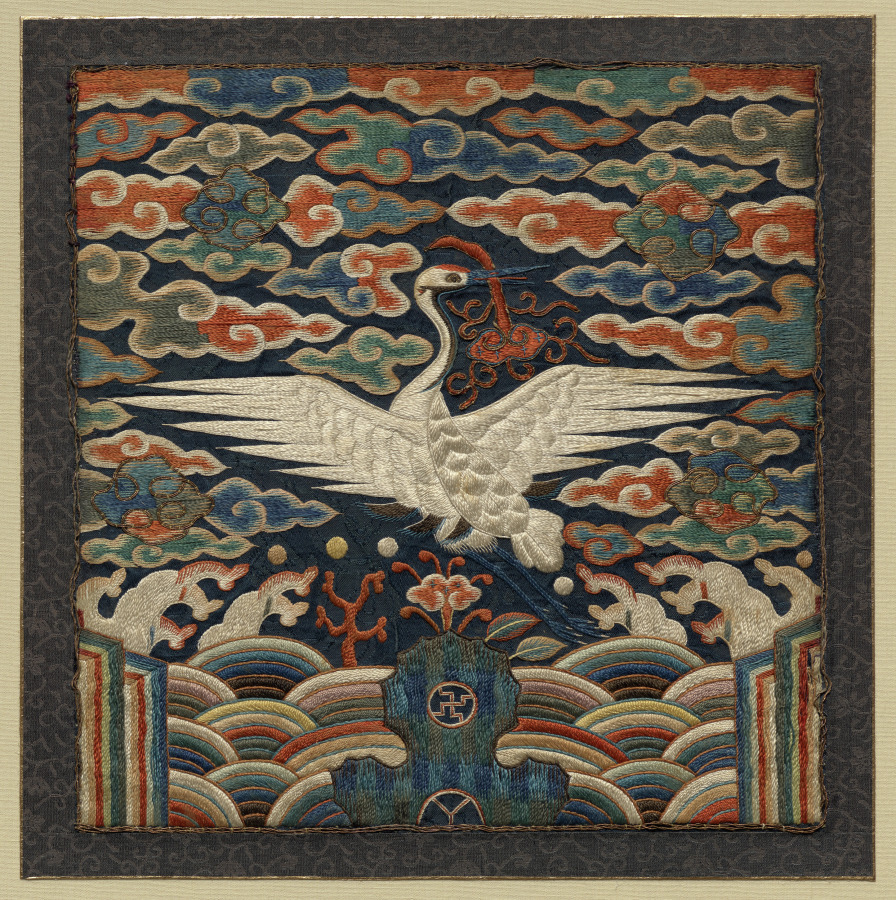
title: Rank Badge with Single Crane Motif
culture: Korea, Joseon dynasty (1392–1910)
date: 1800s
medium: Silk, satin damask weave; silk thread embroidery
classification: Textile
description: Traditionally, square silk badges with embroidered birds and animals were worn on the front and back of official costumes. Rather than simple ornaments, rank badges represent the status of the wearer, with different animals indicating the hierarchy of ranks. The single crane, as on these rank badges, was worn by civil officials of the fourth or higher ranks.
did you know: Many different types of stitches are used in this pair of rank badges. One of them is the couching stitch that uses a thicker foundation thread and a thinner thread. In this work, gold thread is used as the foundation thread.